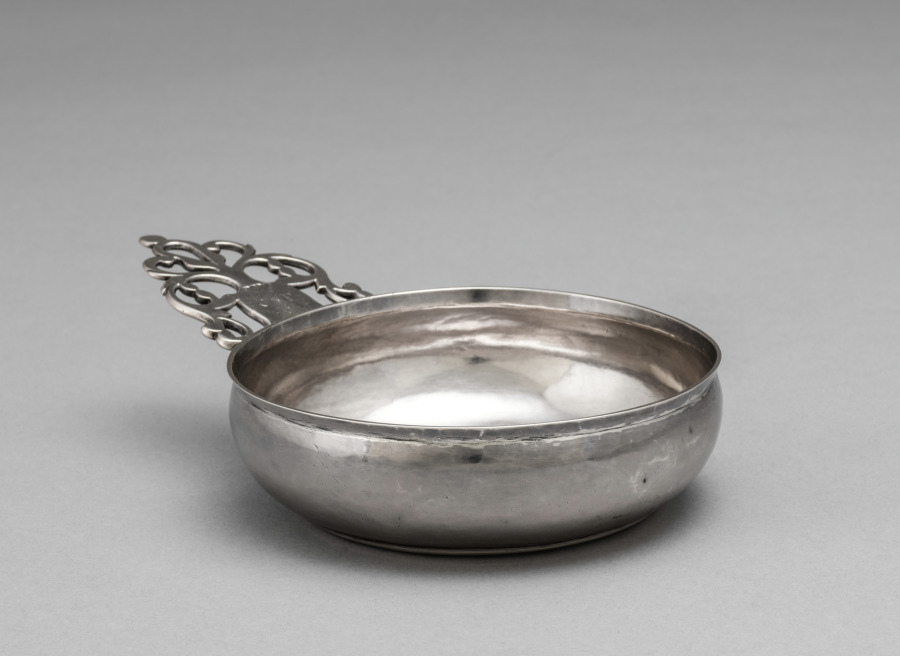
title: Porringer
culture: America, Massachusetts, Boston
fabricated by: Samuel Burt (American, 1724–1754)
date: 1740–50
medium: silver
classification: Silver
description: "Porringer" was the term used in America for a bowl with one handle.